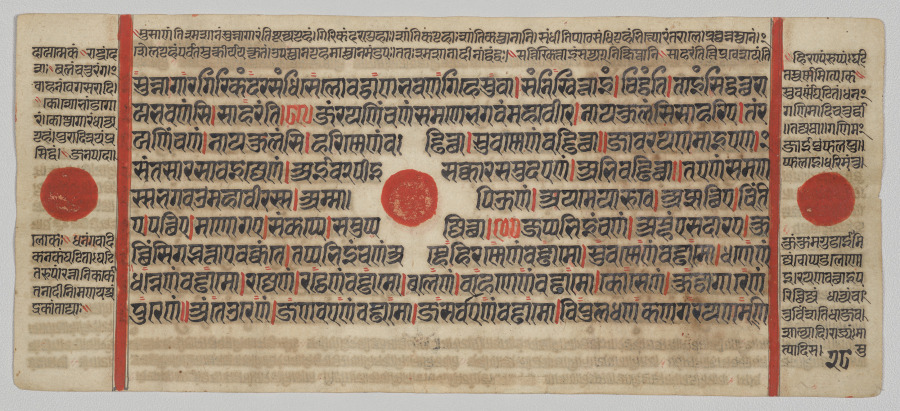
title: Text, Folio 28 (verso), from a Kalpa-sutra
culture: Western India, Gujarat, last quarter of the 15th century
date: c. 1475–1500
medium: Gum tempera, ink, and gold on paper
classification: Painting